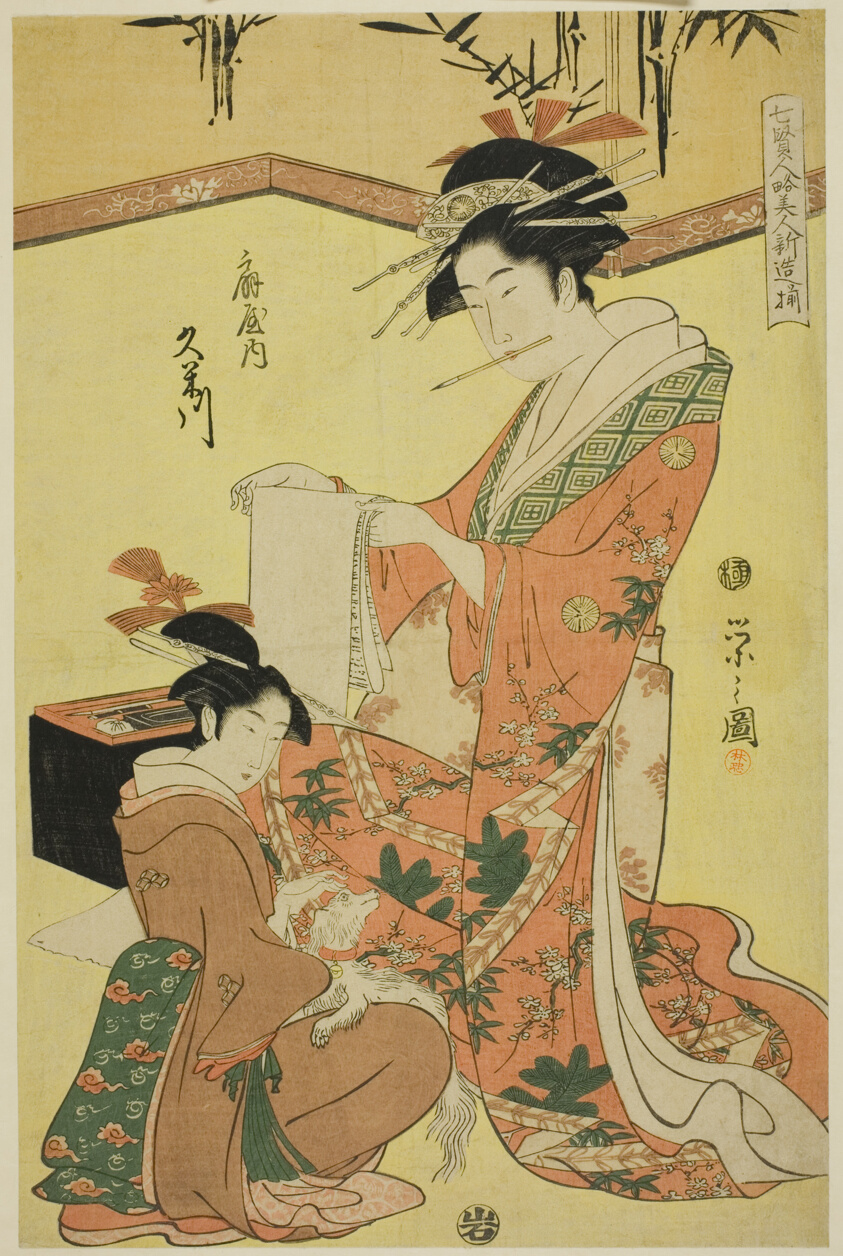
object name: Print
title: Beauties Parodying the Seven Sages - A Selection of Younger Courtesans (Shichi kenjin yatsushi bijin shinzo zoroe): Kumegawa of the Ogiya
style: Japanese (culture or style)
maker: Chobunsai Eishi; Japanese, 1756-1829; Publisher: Iwato-Ya; Japanese, Unknown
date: c. 1793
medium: Color woodblock print; oban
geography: Japan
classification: woodblock print; print; asian art